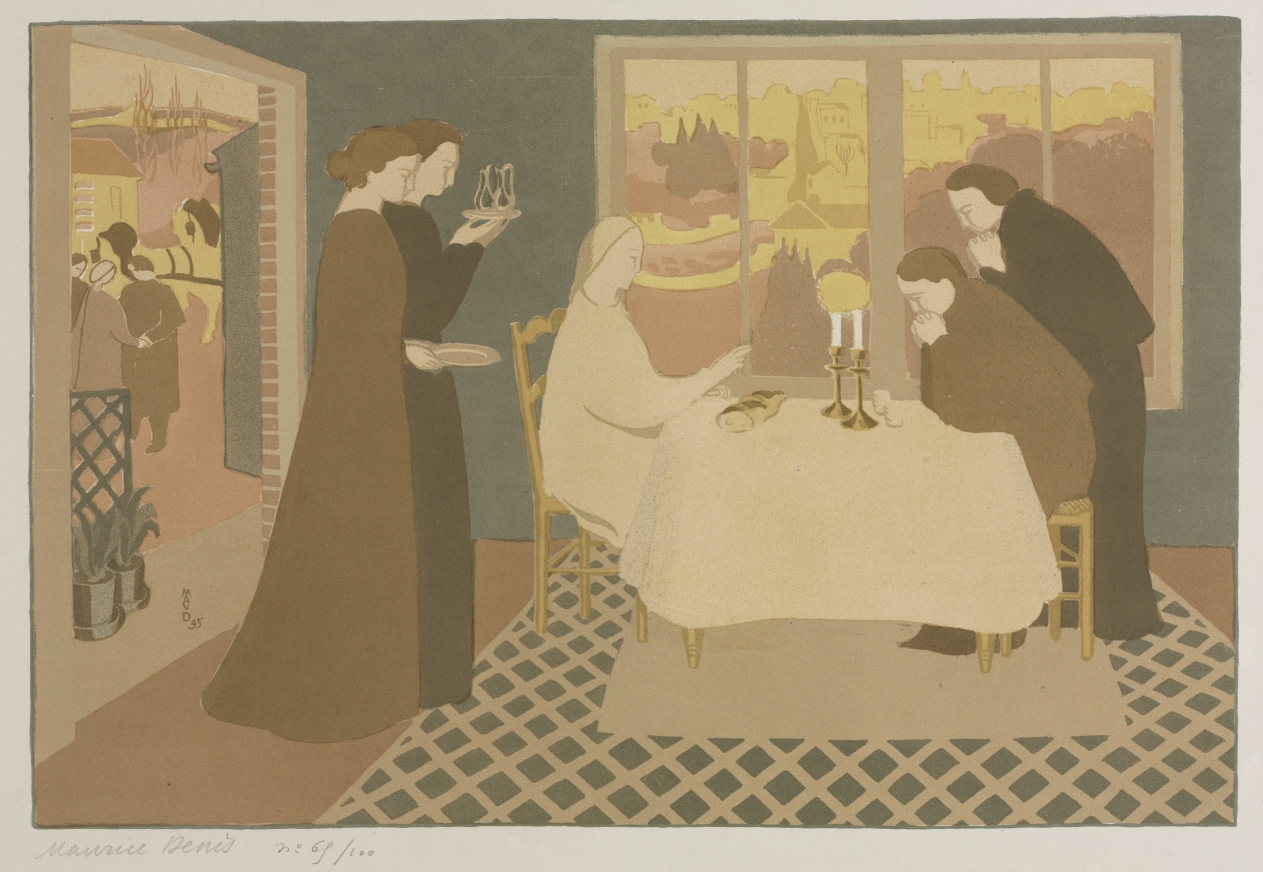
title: The Pilgrims at Emmaus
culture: France, 19th century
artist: Maurice Denis (French, 1870–1943)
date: 1895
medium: lithograph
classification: Print